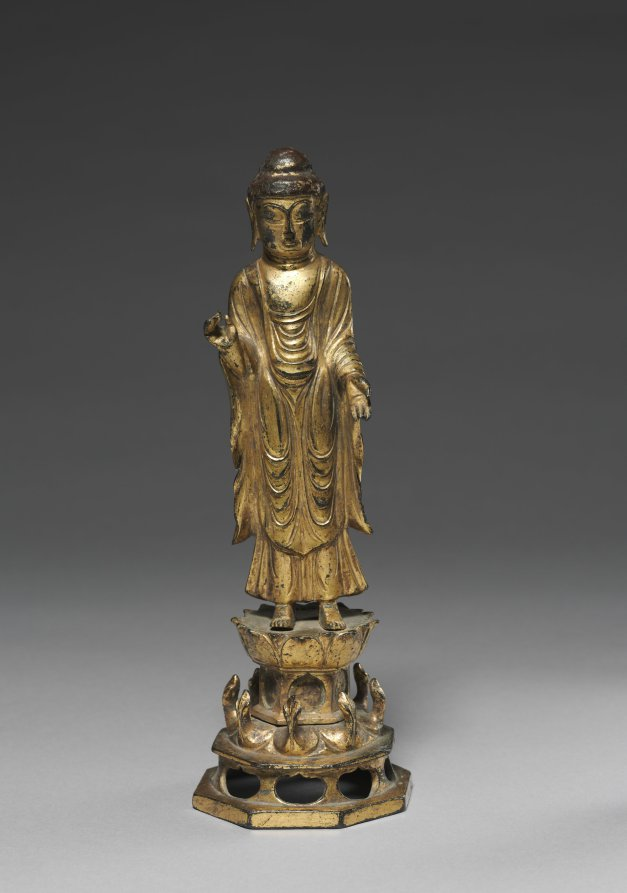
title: Statue of Amitabha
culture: Korea, Unified Silla period (676-935)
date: 800s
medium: gilt bronze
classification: Sculpture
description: This small sculpture shows Amitabha, the Buddha of the Western Paradise and the focus of the Pure Land sect of Buddhism, which was popular across East Asia, including Korea. This deity is recognizable from its right hand raised palm out in a gesture that reassures viewers to have no fear.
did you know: Small statues like this work were designed to be portable, rather than to be permanently housed in a Buddhist temple.